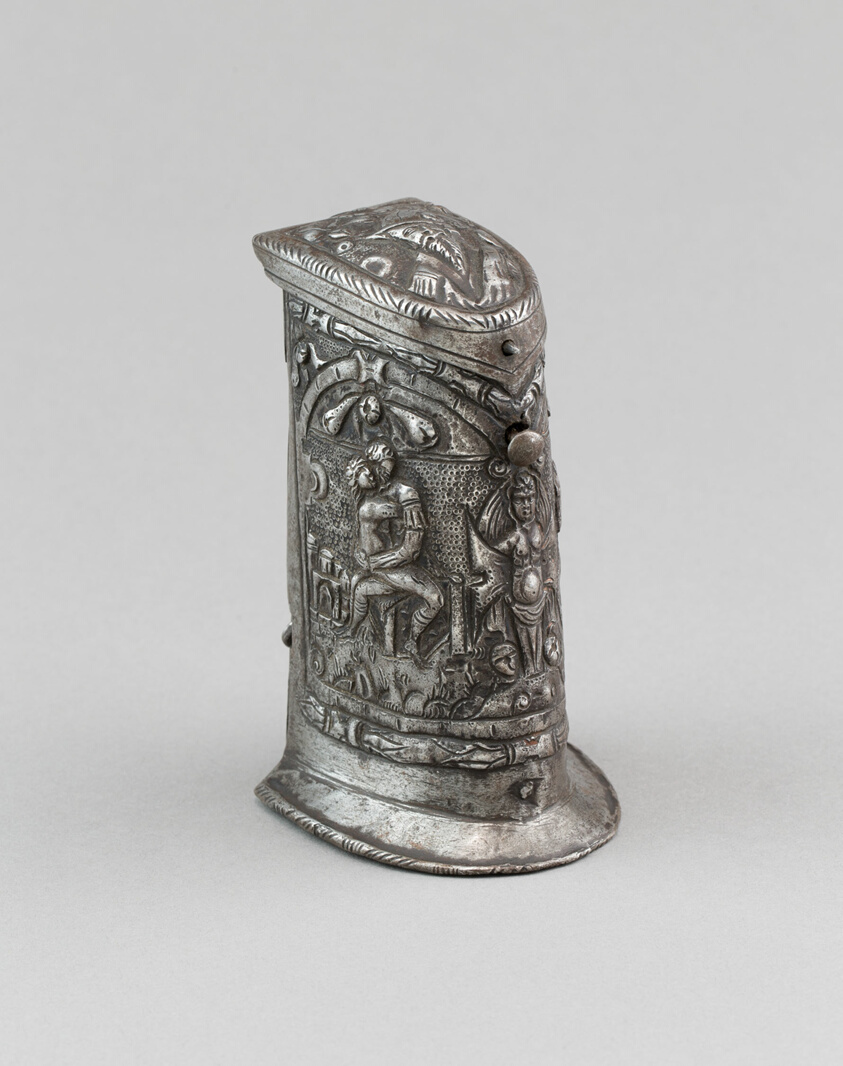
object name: Arms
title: Cartridge Box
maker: German, probably Brunswick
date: 1570/80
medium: Steel, iron and wood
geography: Brunswick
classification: firearm-accessory; arms; arms and armor